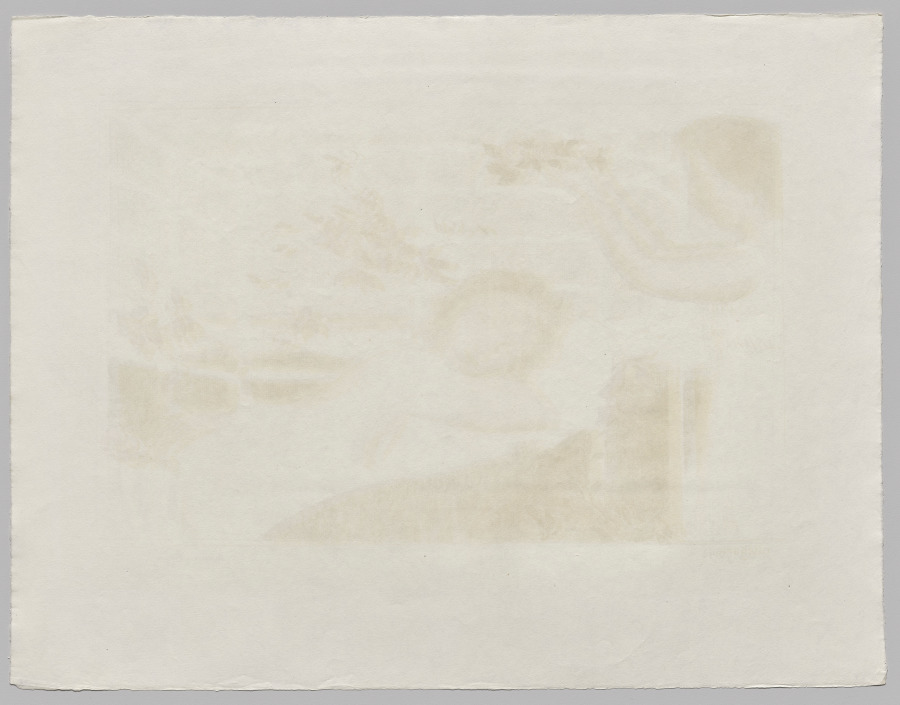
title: Allegory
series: Love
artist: Maurice Denis (French, 1870–1943)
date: 1899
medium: color lithograph on wove paper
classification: Print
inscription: Recto, lower left: “Allegorie”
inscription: In graphite, recto, lower right: “Maurice Denis (signed)”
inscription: In graphite, recto, lower left: “368”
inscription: In graphite, recto, lower right: “43”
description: Maurice Denis belonged to the Nabis, a group of artists who came together in 1889 to pursue a radical new style informed by subjective experience and emotion. This print is from a series in which Denis explored his devotion to his wife, Marthe, by depicting her in a variety of settings alongside titles drawn from his own journal. The vague but evocative images were meant to encourage the viewer to draw connections to the theme and meditate on its meaning.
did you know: Maurice Denis was a devout Catholic and often drew visual connections between his wife, Marthe, the subject of this print series, and the Virgin Mary.